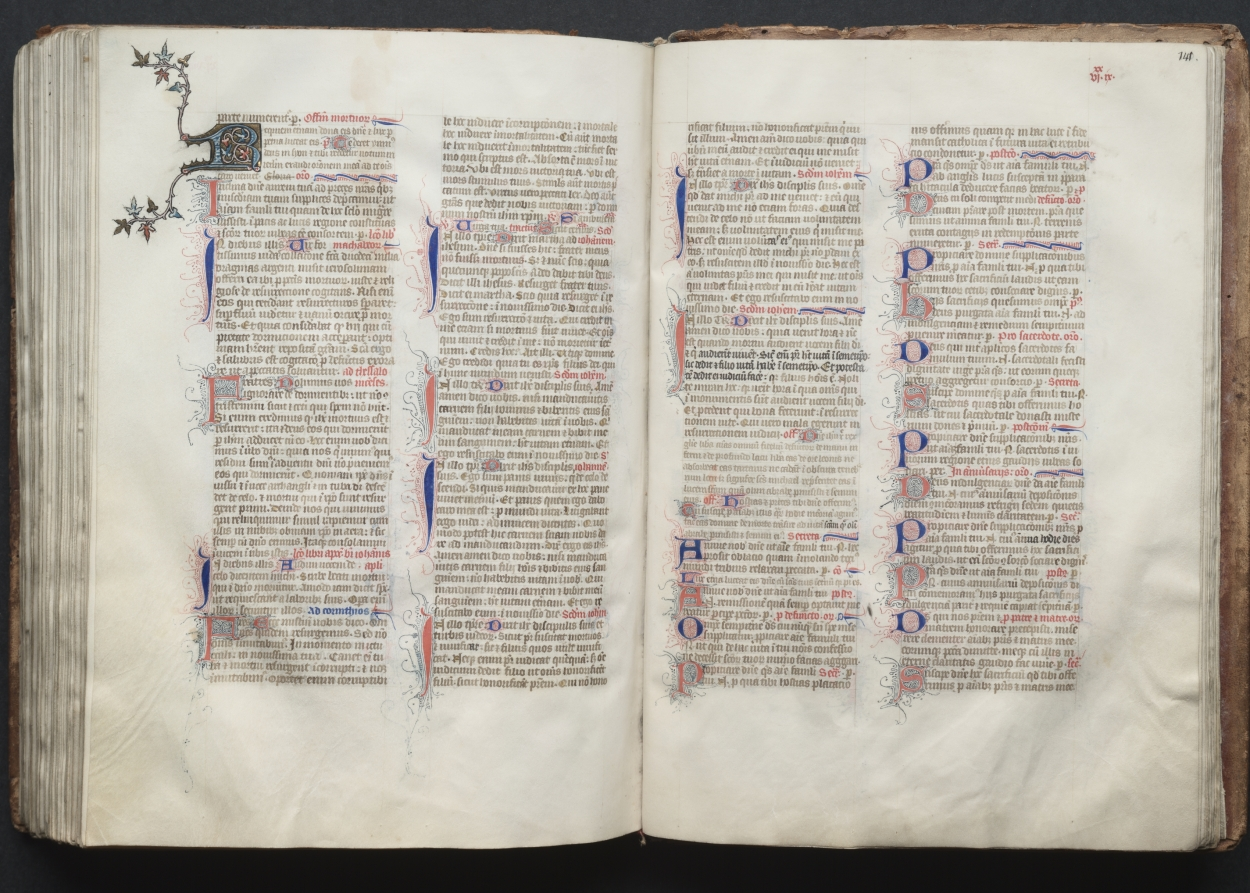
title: The Gotha Missal: Fol. 141r, Text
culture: France, Paris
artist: Master of the Boqueteaux (French)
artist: and Workshop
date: c. 1375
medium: ink, tempera, and gold on vellum; blind-tooled leather binding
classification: Bound Volume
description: The style and quality of this manuscript's decoration is typical of deluxe Parisian books made for aristocratic or royal patrons. Most of the book's decoration appears to be the work of the Master of the Boqueteaux, an artist active at the court of King Charles V (died 1380). His style was apparently shared by a number of book illuminators working in and around Paris. It is very possible that the Gotha Missal belonged to Charles V, but is not provable because the manuscript has no royal portraits and lacks a colophon. Given the book's magnificent decoration, however, it would seem that it was produced for a Valois prince, if not for the king himself. The manuscript receives its name from the German dukes of Gotha, its later owners.